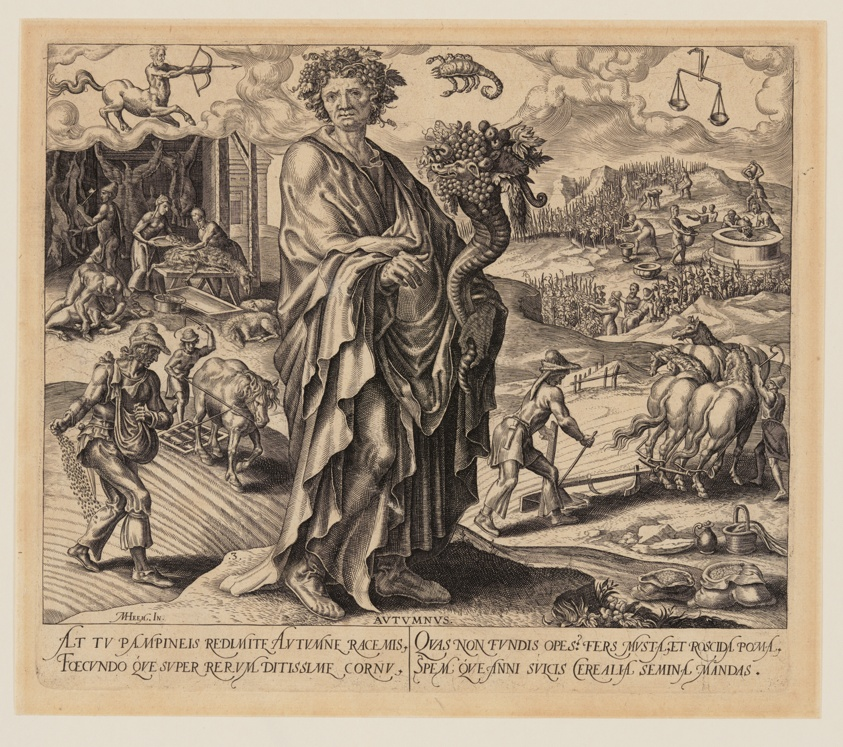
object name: Print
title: Autumn, from The Four Seasons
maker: Philips Galle (Flemish, 1537-1612); after Maerten van Heemskerck (Dutch, 1498–1574)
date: 1563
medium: Engraving on ivory laid paper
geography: Flanders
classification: engraving; paper; print; prints and drawing